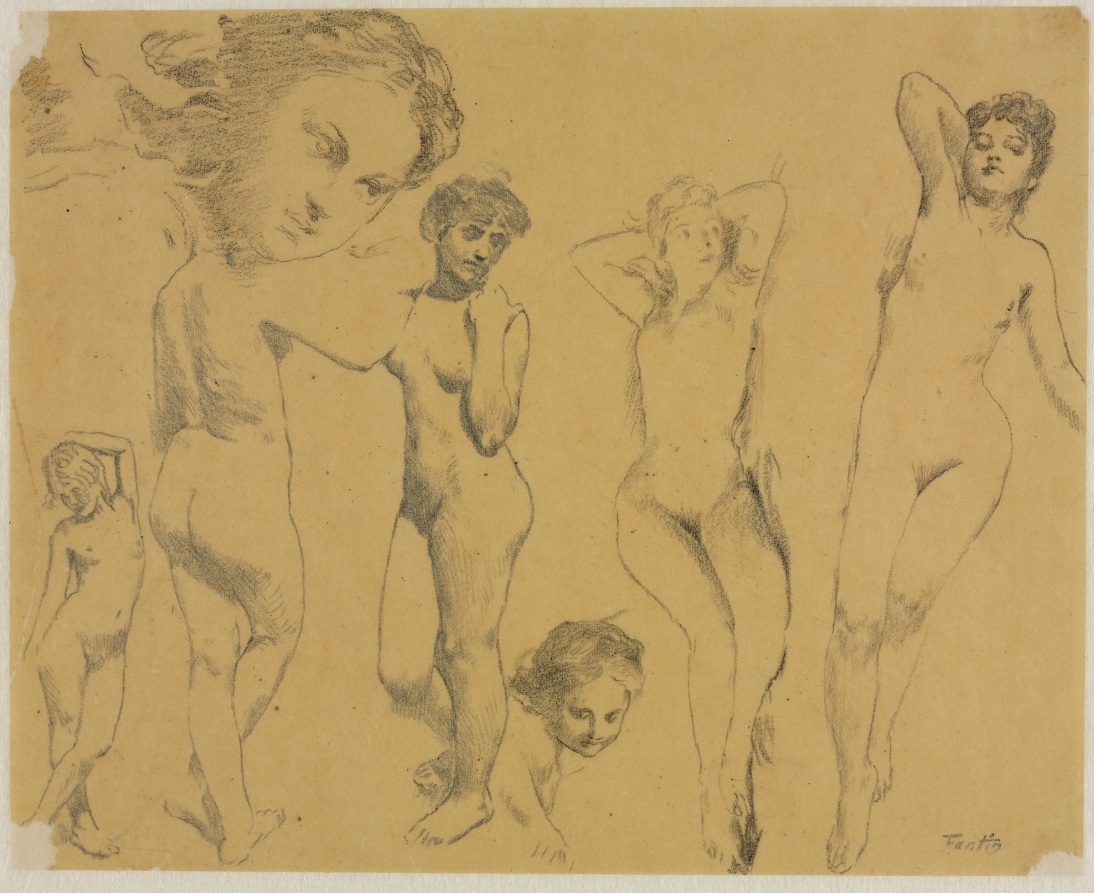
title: Studies of Female Nudes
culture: France, 19th century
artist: Henri Fantin-Latour (French, 1836–1904)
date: c. 1895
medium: black crayon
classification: Drawing